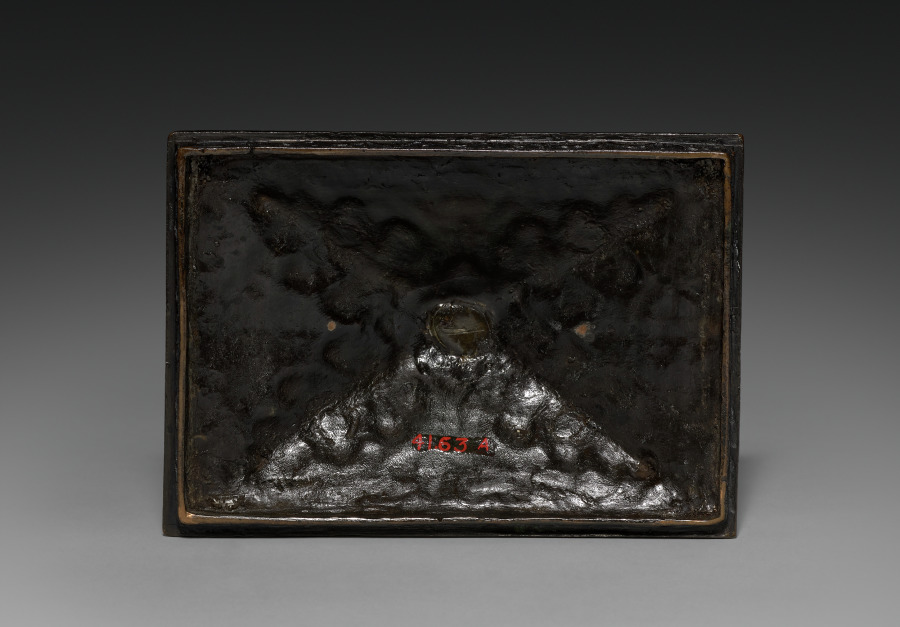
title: Writing Casket (lid)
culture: Italy, Ravenna, 16th century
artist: workshop of Severo da Ravenna (Italian, c.1496–c.1543)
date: c. 1525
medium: bronze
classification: Sculpture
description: The interior is divided into four compartments for storing writing implements and sand for blotting.